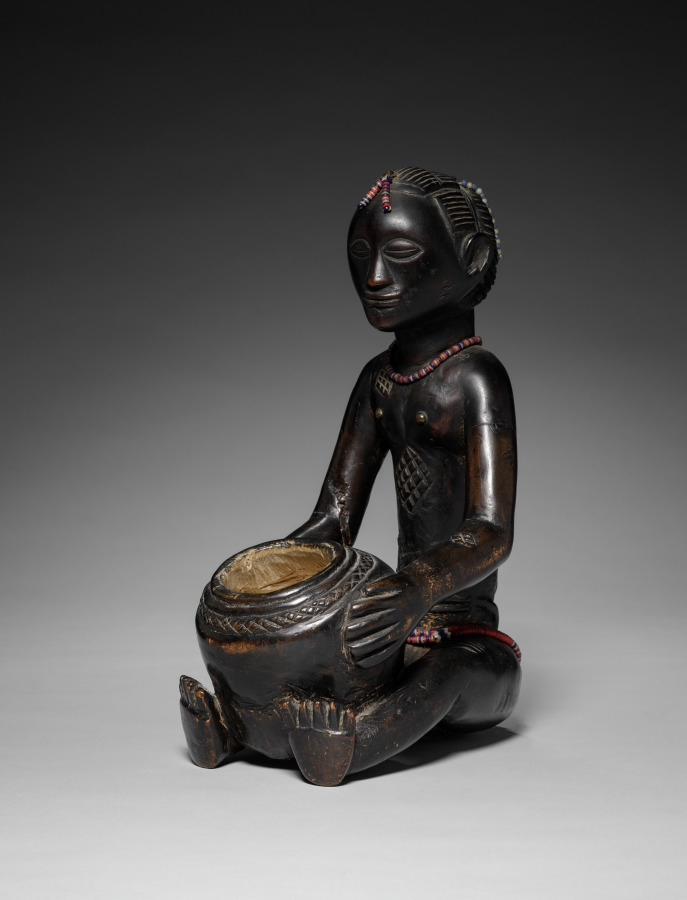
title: Female Bowl-Bearing Figure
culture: Africa, Central Africa, Democratic Republic of Congo, Luba-style carver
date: late 1800s-early 1900s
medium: Wood, glass beads, upholstery studs, plant fiber, and iron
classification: Sculpture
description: In Luba-style art, an object's beauty affects how well it works. While bowl-bearing figures had many possible uses, a royal diviner likely used this well-carved image of a woman carrying a bowl in rituals. Dusty traces of mpemba (white chalk) fleck the shining exterior and the bowl's interior, showing it once held this sacred powder. Diamond-shaped scarification marks at her waist, chest, and back add to her beauty. Her hair is carved into the cascading layered hairstyle worn in the Luba region at the turn of the twentieth century. Strands of imported glass beads encircle her waist and neck, and dangle from her hair. The alternating white and blue beads may symbolize the moon and Mbidi Kiluwe, a culture hero linked to royal practice and smithing. While much Luba-style art depicts women--who are societally important--men created and owned the majority of such works.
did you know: Symbolic of anvils, the round metal tacks decorating the figure's hair "pin" spirits and their secrets within it. They are at the hairline and each of the four hair cascades (the bottommost is now gone).